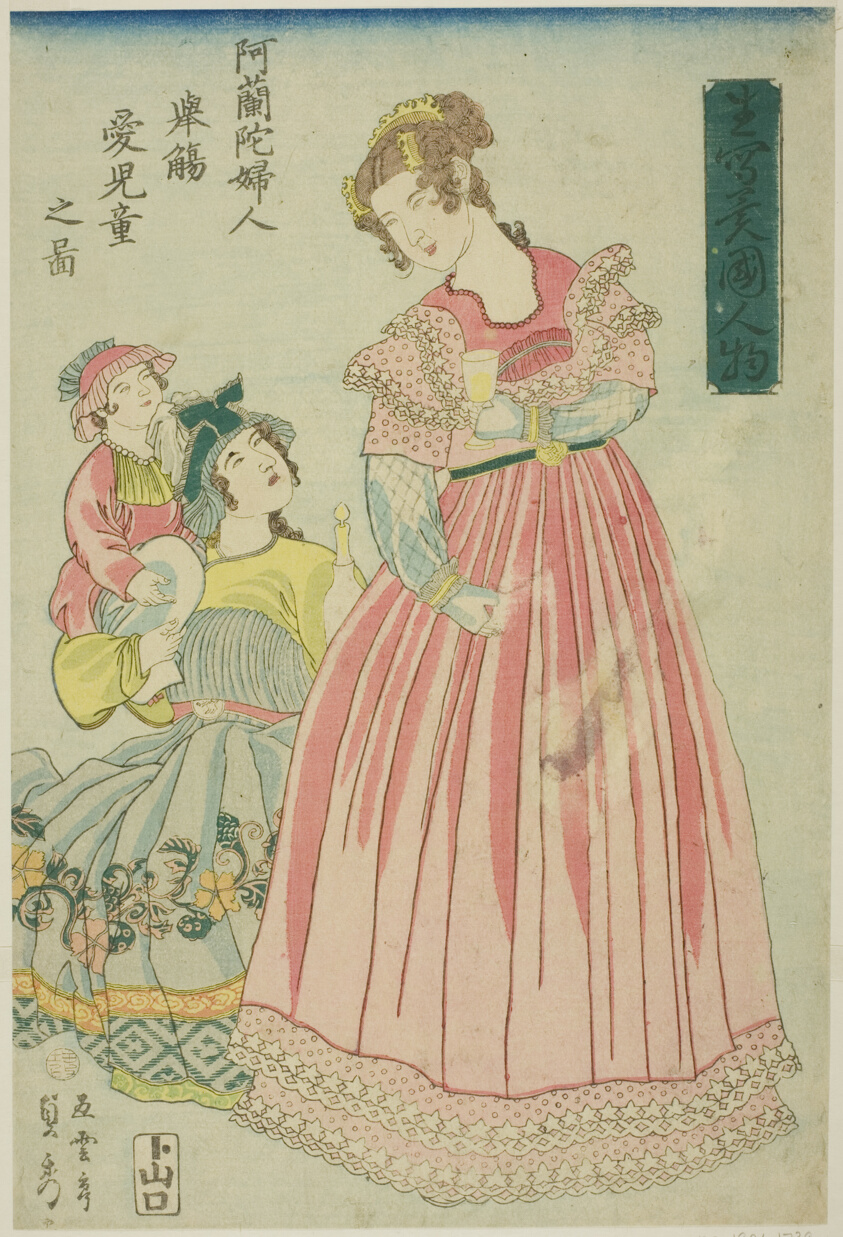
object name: Print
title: Dutch Woman Making a Toast to Her Children (Oranda fujin kyosho aijido no zu), from the series "Foreigners Drawn from Life (Ikiutsushi ikoku jinbutsu)"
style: Japanese (culture or style)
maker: Utagawa Sadahide (Japanese, 1807-1873)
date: 1860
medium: Color woodblock print; oban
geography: Japan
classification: woodblock print; print; asian art